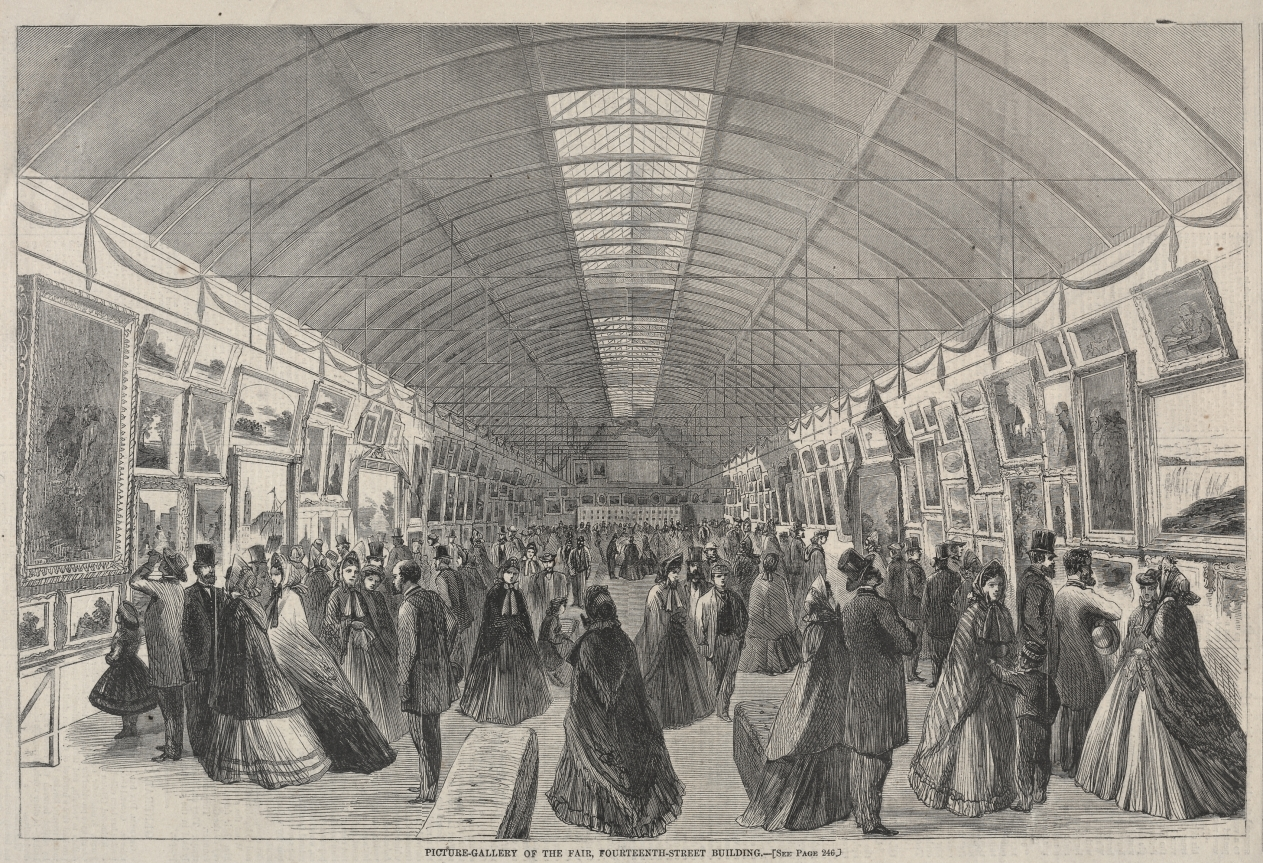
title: Picture Gallery of the Fair, Fourteenth Street Building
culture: America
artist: Winslow Homer (American, 1836–1910)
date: c. 1864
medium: wood engraving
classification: Print